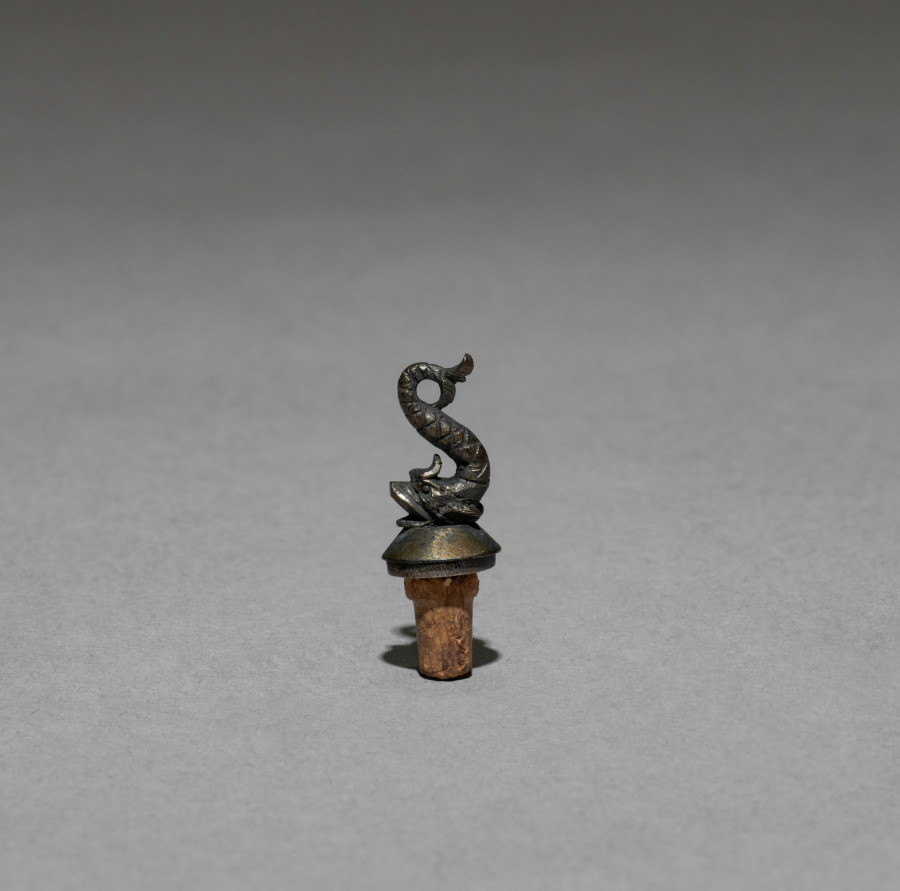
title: Stopper for a Scent Bottle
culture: Continental, mid-19th century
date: mid-1800s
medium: ivory with gold and silver mounts set with jewels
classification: Miscellaneous